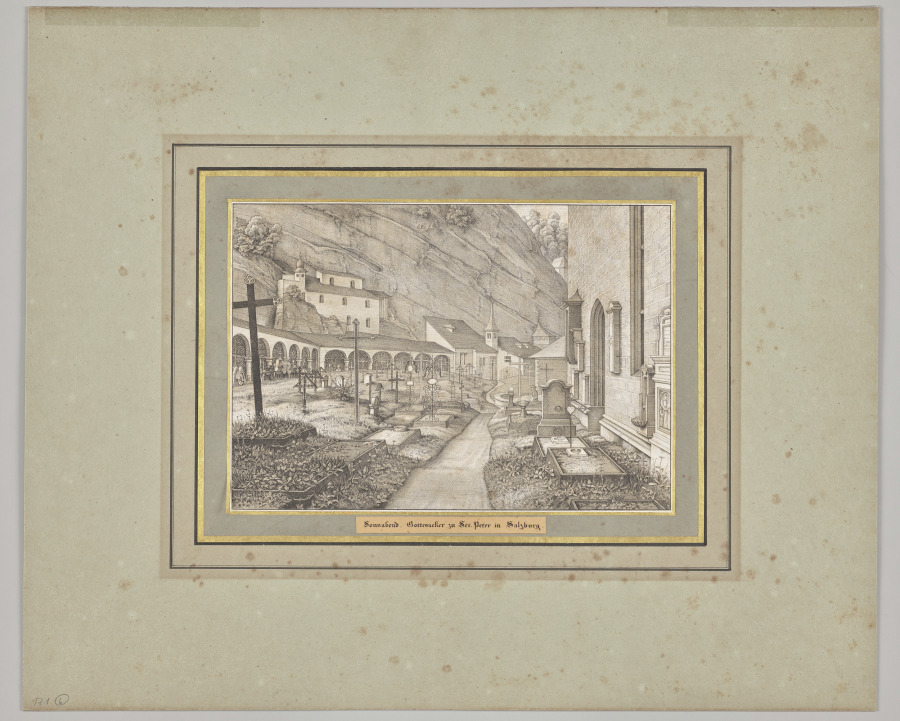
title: Saturday. Gottesacker to Sct. Peter in Salzburg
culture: Germany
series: Seven Areas from Salzburg and Berchtesgaden. Arranged according to the seven days of the week, connected by two allegorical sheets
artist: Ferdinand Olivier (German, 1785–1841)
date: 1818–23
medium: lithograph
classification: Print